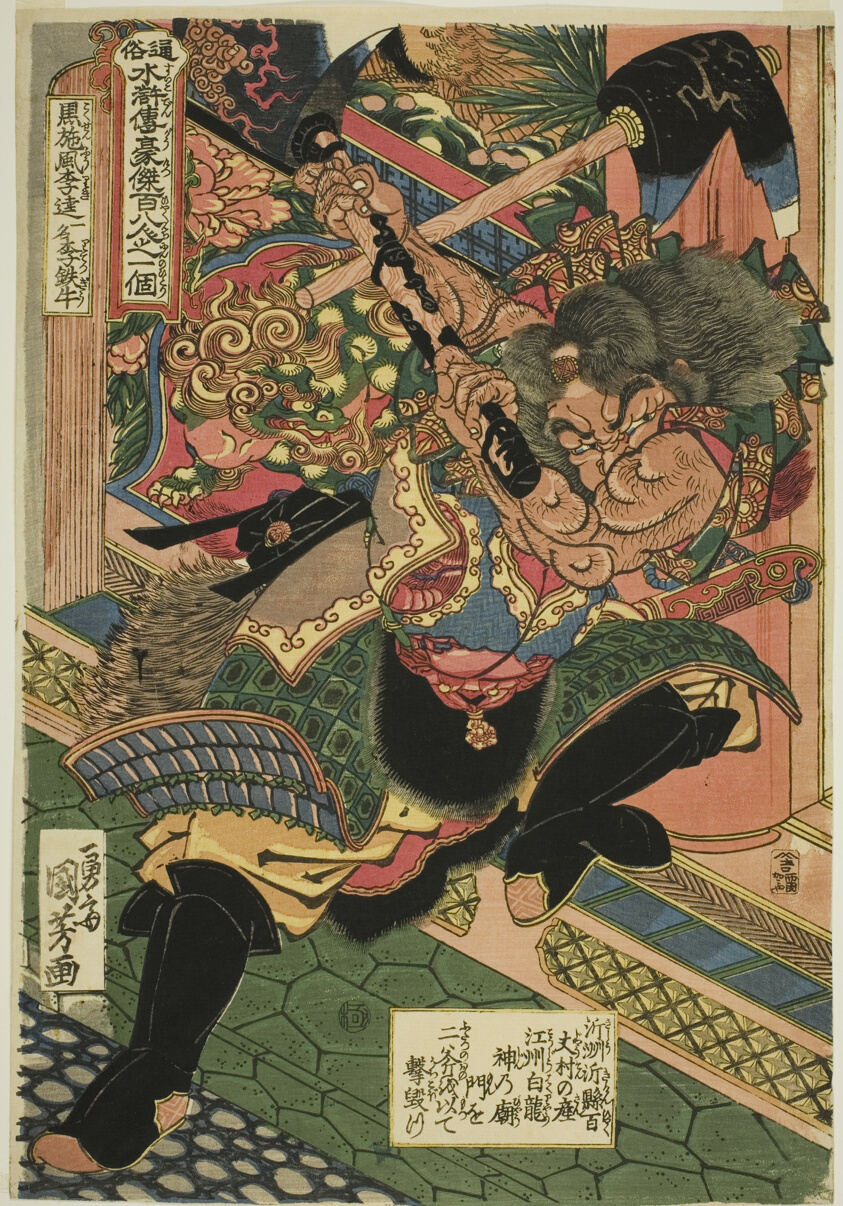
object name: Print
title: Li Kui (Kokusenpu Riki, ichimei Ritetsugyu), from the series "One Hundred and Eight Heroes of the Popular Water Margin (Tsuzoku Suikoden goketsu hyakuhachinin no hitori)"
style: Japanese (culture or style)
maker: Utagawa Kuniyoshi (Japanese, 1797-1861)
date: c. 1827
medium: Color woodblock print; oban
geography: Japan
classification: woodblock print; print; asian art